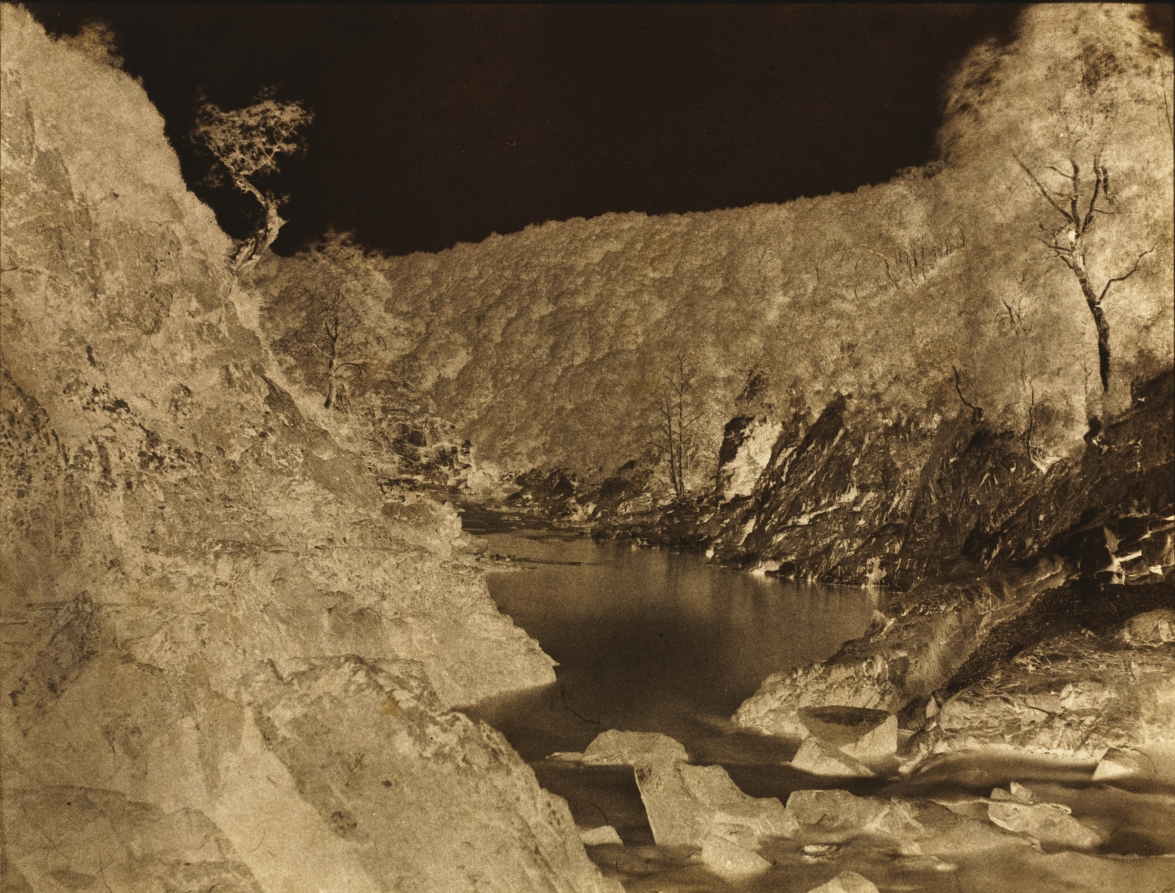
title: River Landscape, Scotland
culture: England, 19th century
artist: Captain Horatio Ross (British, 1801–1886)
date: c. 1858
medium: waxed paper negative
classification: Photograph